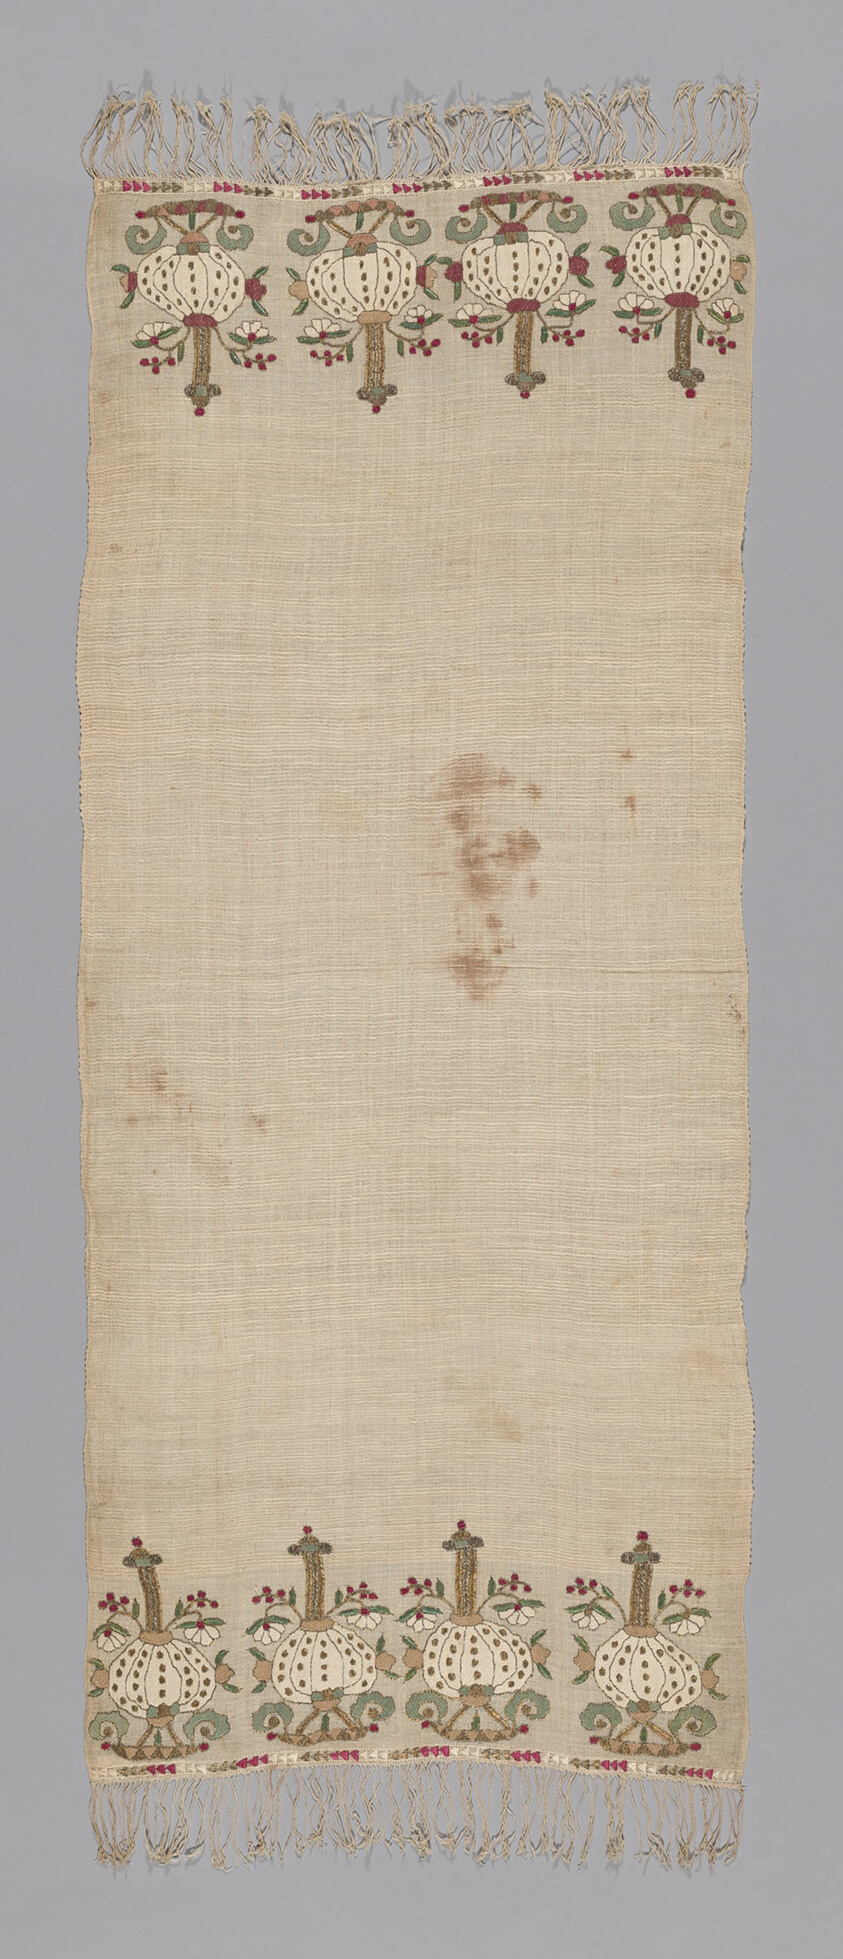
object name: Textile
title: Towel or Napkin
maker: Turkey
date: 19th century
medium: Embroidered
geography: Turkey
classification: textile; needlework (visual works); weaving